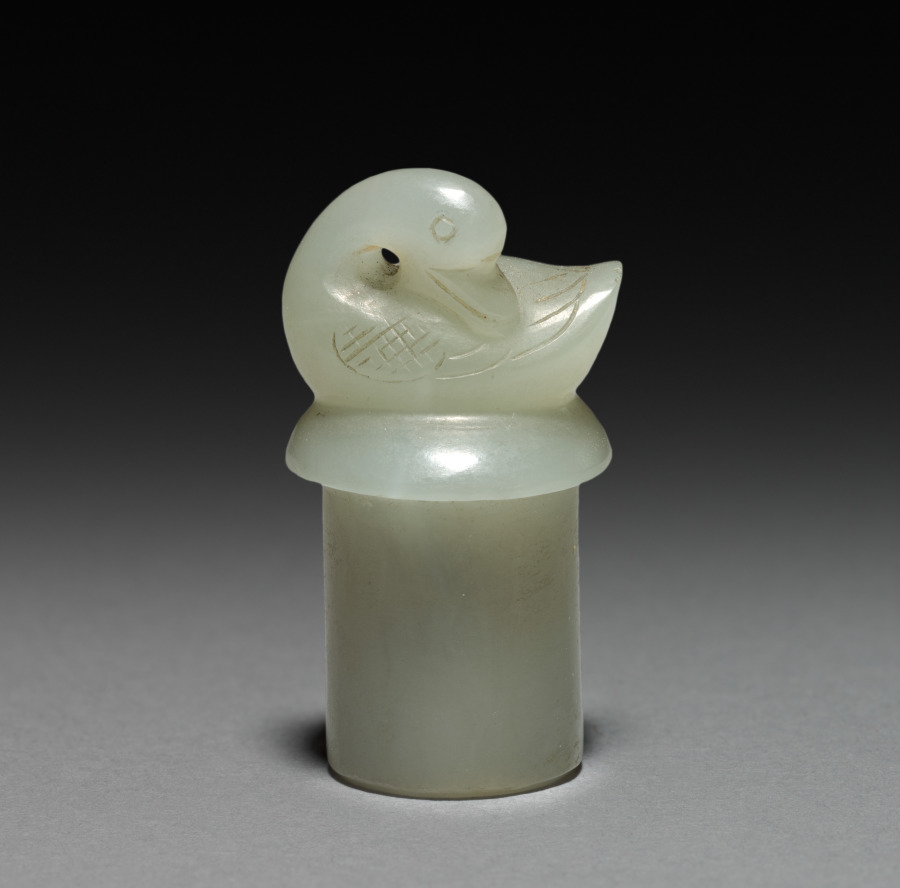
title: Goose and Goslings (Stopper)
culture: China, Qing dynasty (1644-1911)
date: 1700s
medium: jade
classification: Jade